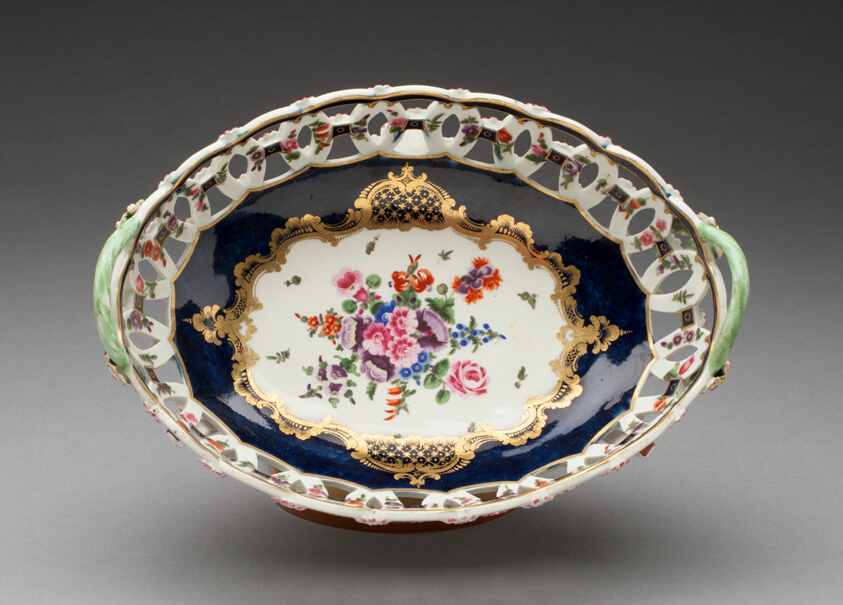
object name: Ceramics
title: Basket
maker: Worcester Porcelain Factory (Warmstry House Period, 1751–1783); Worcester, England, founded 1751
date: c. 1770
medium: Soft-paste porcelain, underglaze blue, polychrome enamels and gilding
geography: Worcester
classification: tableware; porcelain; ceramics; european decorative arts